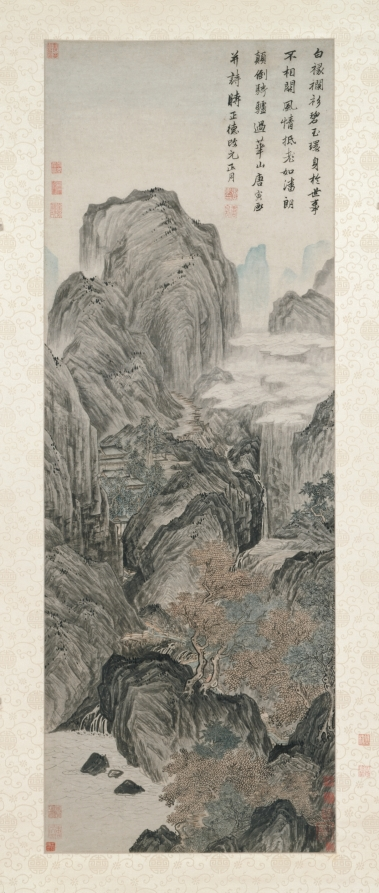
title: Mount Hua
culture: China, Ming dynasty (1368–1644)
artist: Tang Yin (Chinese, 1470–1523)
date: 1506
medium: hanging scroll; ink and light color on paper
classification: Painting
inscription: Artist's inscription, signature, and 4 seals: Wearing a white-bordered scholar's robe and green jade pendants, His life is unconcerned with worldly fame. Like P'an Lang resisting old age through high spirits, Crazy and clumsy he rides his donkey past Mount Hua. T'ang Yin painted this and composed the poem, the first month of the year of the Cheng-te era [1506]. [2 seals] T'ang Tzu-wei yin; T'ang. [2 seals, lower left corner] Po-hu T'ang Yin ssu yin; T'ang Chü-shih. trans. LYSL 12 additional seals: 2 of Wang Shan (1645-1728); 5 of Liu Shu (1759-1816); 1 of Yeh Ao (19th c.); 1 label and 2 seals of Lu Hui (1851-1920); 2 seals unidentified.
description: In this work, Tang Yin accumulates towering mountain summits in the manner of the Sung master, Li Tang, to capture the monumental presence of his subject. Tang Yin’s angular brushstrokes and ink washes of varied intensity give texture to the rocky surface and accent the play of light. Mount Hua is situated in southern Shaanxi province in North China. Hardly accessible during Tang Yin’s time, the mountains were frequented by immortality seekers to dwell or collect herbal drugs there. Tang Yin's potentially brilliant career was shattered in 1499 after he went to the capital to take the jinshi examination. He got entangled in a bribery case that caused him to spend seven years in prison. After his release, Tang returned to Suzhou, and settled on a career as a professional painter. One of Tang's few dated works, Mount Hua was painted seven years after this incident.